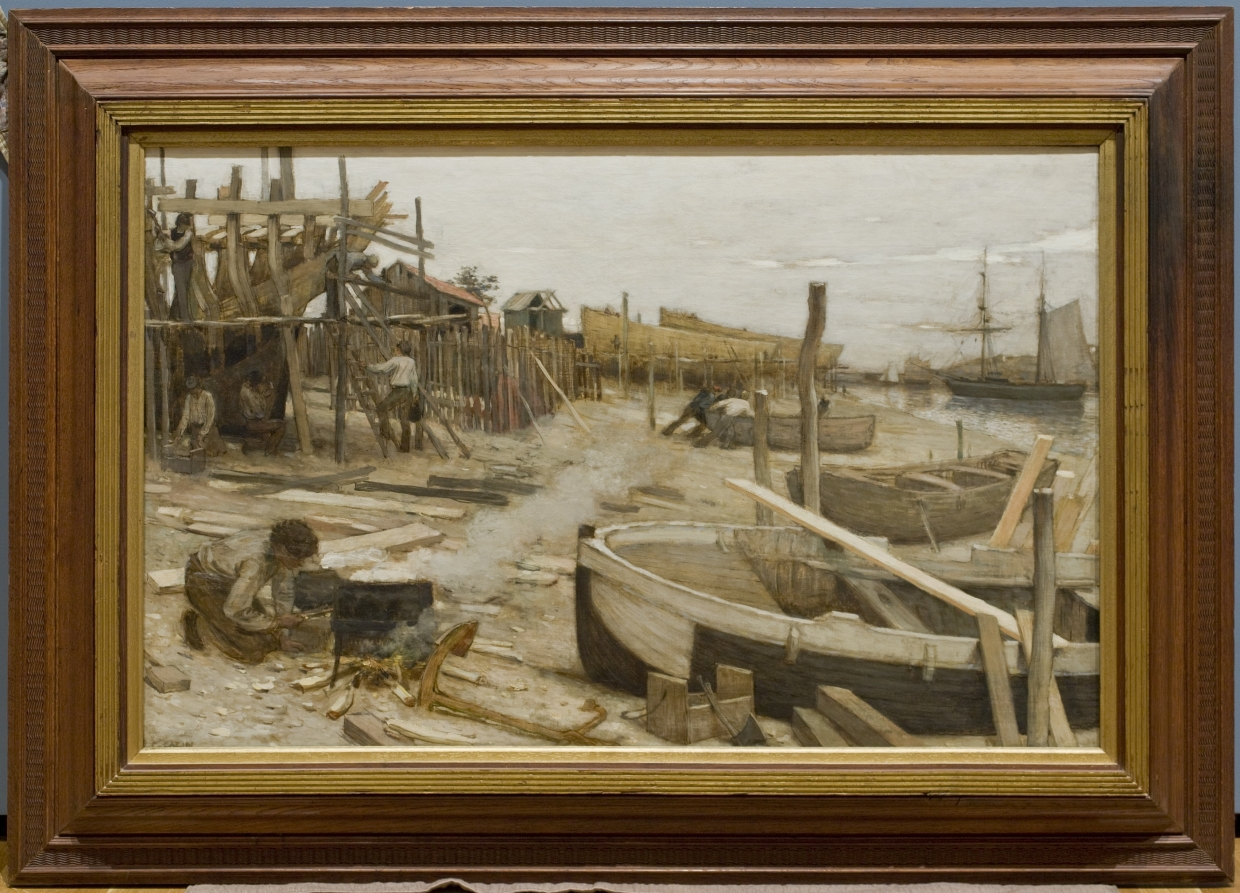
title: The Boatyard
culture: France, 19th century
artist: Jean-Charles Cazin (French, 1841–1901)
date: c. 1875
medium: oil on fabric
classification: Painting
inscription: Signed lower left: c. cazin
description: Cazin exhibited this painting at the Paris Salon of 1876, marking the start of his official career. It depicts a boatyard in the artist's native Boulogne, a port city on the English Channel. The young man in the foreground is melting tar at a smoky fire, while men work on a boat just above him. Cazin was associated with the Realist movement during his early years and later with the Impressionists.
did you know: This painting was submitted to the Paris Salon in 1876 as Cazin’s first major work.